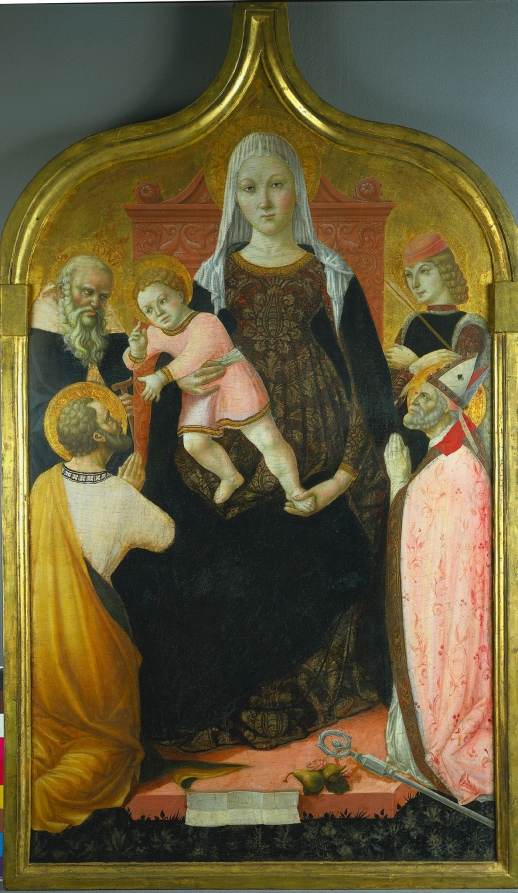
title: Virgin and Child, with Saints Anthony Abbott, Mark, Severino, and Sebastian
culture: Italy, 15th century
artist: Lorenzo da Sanseverino (Italian, 1468–1500)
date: c. 1490–96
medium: tempera on gold wood panel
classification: Painting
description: The finest textiles and dress associated with the aristocracy were often represented in religious paintings. Here, the Virgin is clothed in a fashionably tailored dress with close-fitted sleeves made of luxurious velvet. Gold thread forms the pomegranate pattern on the deep crimson velvet ground. Saint Sebastian (on the right) wears an equally opulent velvet doublet under his sleeveless tunic.